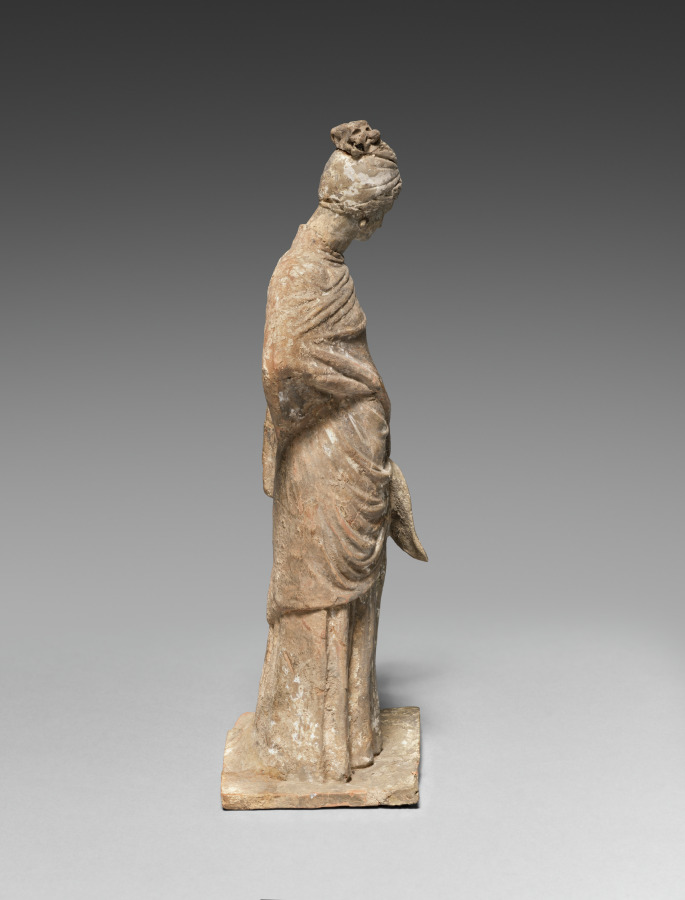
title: Figurine of a Lady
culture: Greece, Tanagra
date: 200s BCE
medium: terracotta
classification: Sculpture